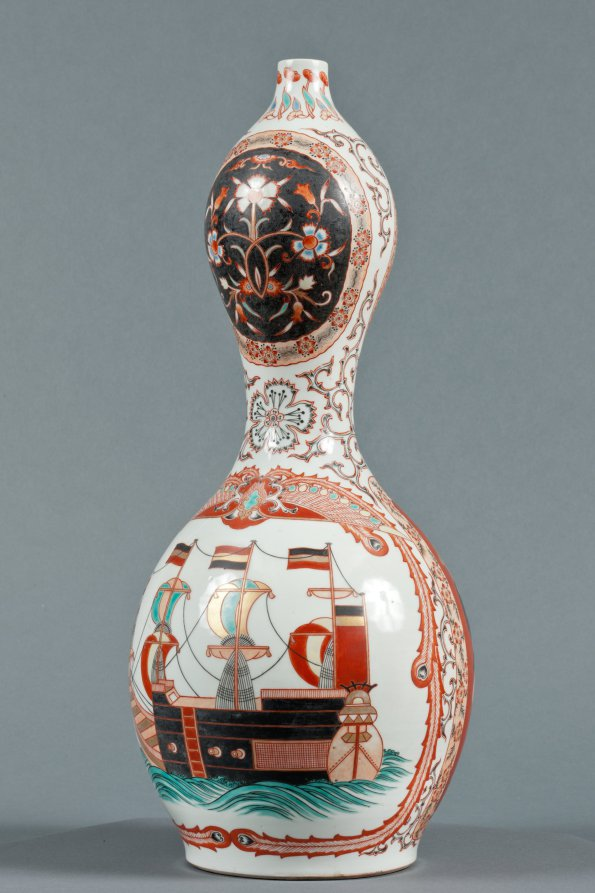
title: Bottle with Western Ships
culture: Japan, Edo period (1615–1868)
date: c. 1800–1868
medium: Porcelain with decoration in colored enamels and underglaze blue, overglaze enamels, and gold (Hizen ware, Arita type)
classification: Ceramic